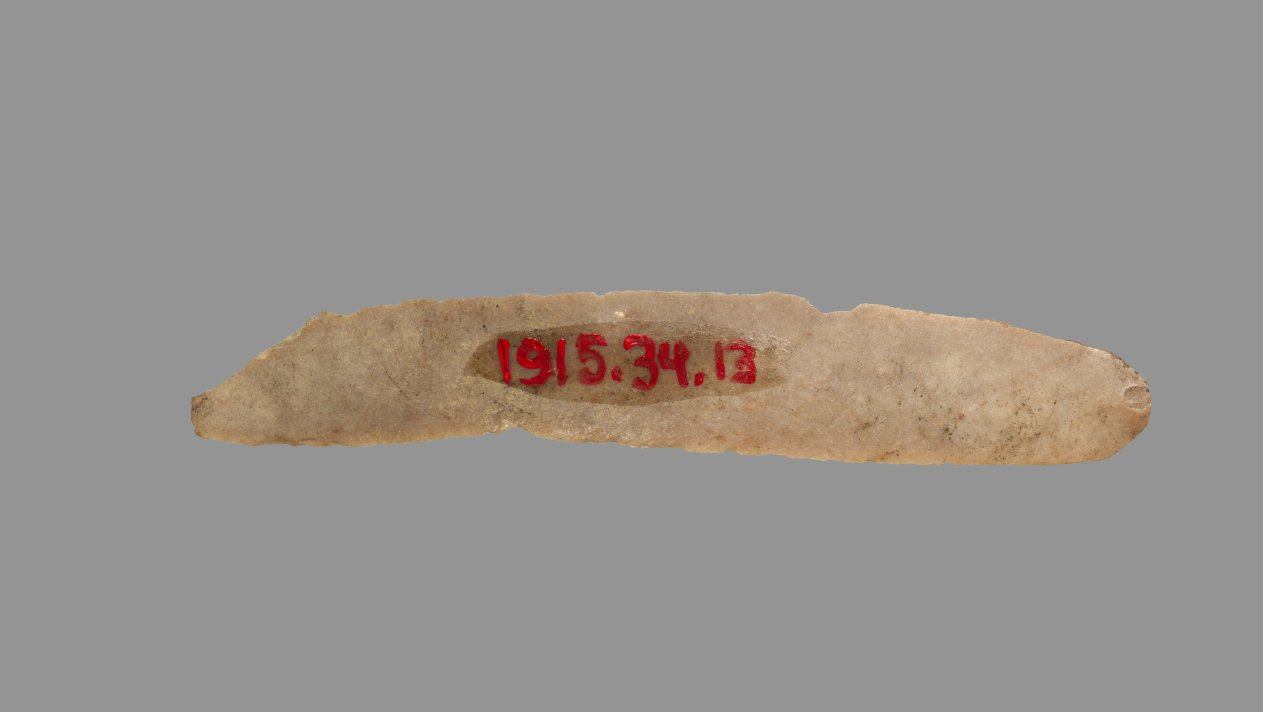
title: Sickle Blade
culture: Egypt, Middle Kingdom (2040–1648 BCE), Dynasty 12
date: 1980–1801 BCE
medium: flint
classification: Implements